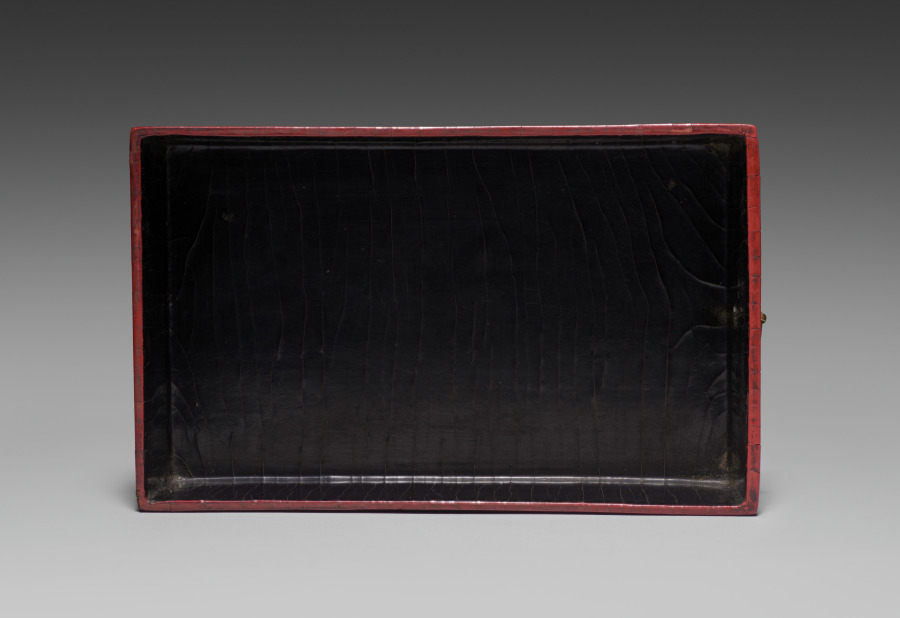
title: Drawer for a Tihong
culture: China, Ming dynasty (1368-1644), Wanli reign (1572-1620)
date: 1585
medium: carved cinnabar lacquer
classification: Lacquer